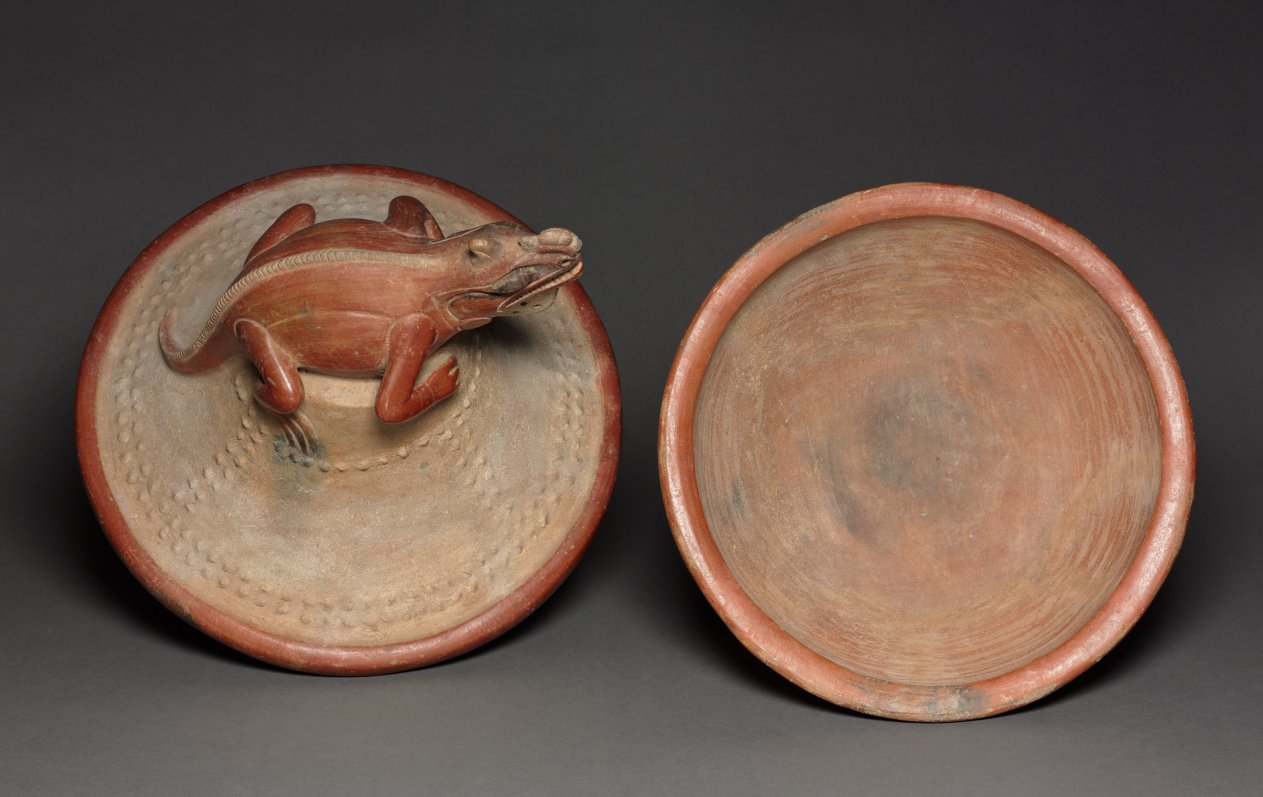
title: Lidded Bowl with Iguana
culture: Costa Rica, Southern Nicoya region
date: c. 600–1100 (Thermoluminescence date, 995–1395)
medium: ceramic, slip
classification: Ceramic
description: At the time of the Spanish conquest in the 16th century, Costa Rican mythology linked iguanas to the sky and to rulers. The earlier makers of this vessel left no written records, but they may have had similar beliefs. The lizard poses as though basking in the sun, a celestial body, and assumes an aggressive stance that could be likened to a ruler's: the teeth and chin under the dewlap are displayed, Also, fine ceramics like this were buried in the graves of the high-status dead, some of them certainly leaders of the several groups that competed in the area.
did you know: Green iguanas can grow to be over 6 feet long.